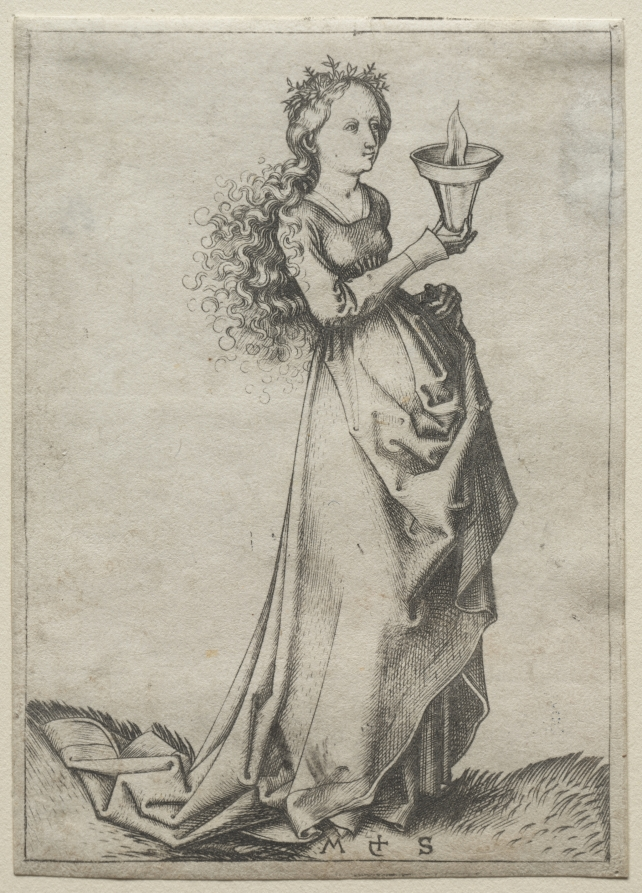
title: The First Wise Virgin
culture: Germany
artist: Martin Schongauer (German, c. 1450–1491)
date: 1469–79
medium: engraving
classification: Print